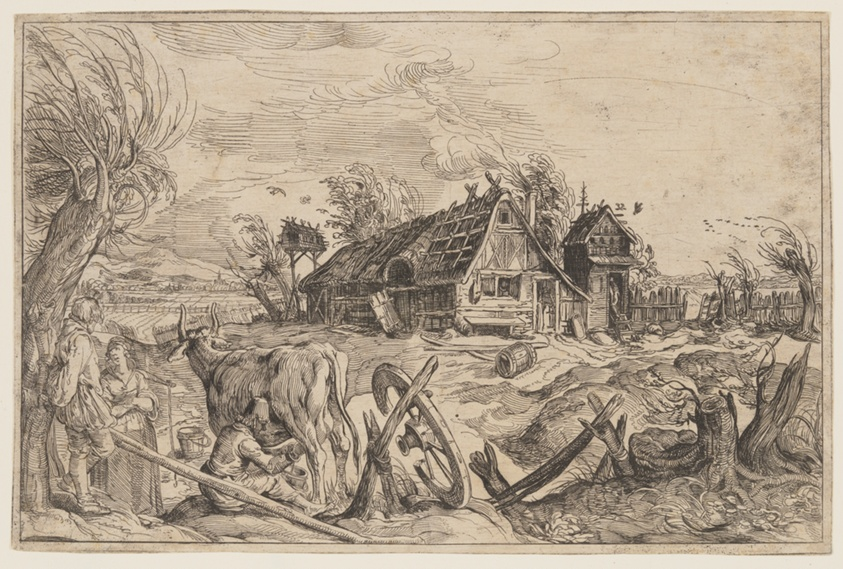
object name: Print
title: Landscape with a Farmhouse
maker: After Jacques de Gheyn II; Dutch, 1565–1629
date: possibly 18th century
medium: Etching on ivory laid paper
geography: Netherlands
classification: print; paper; etching; prints and drawing